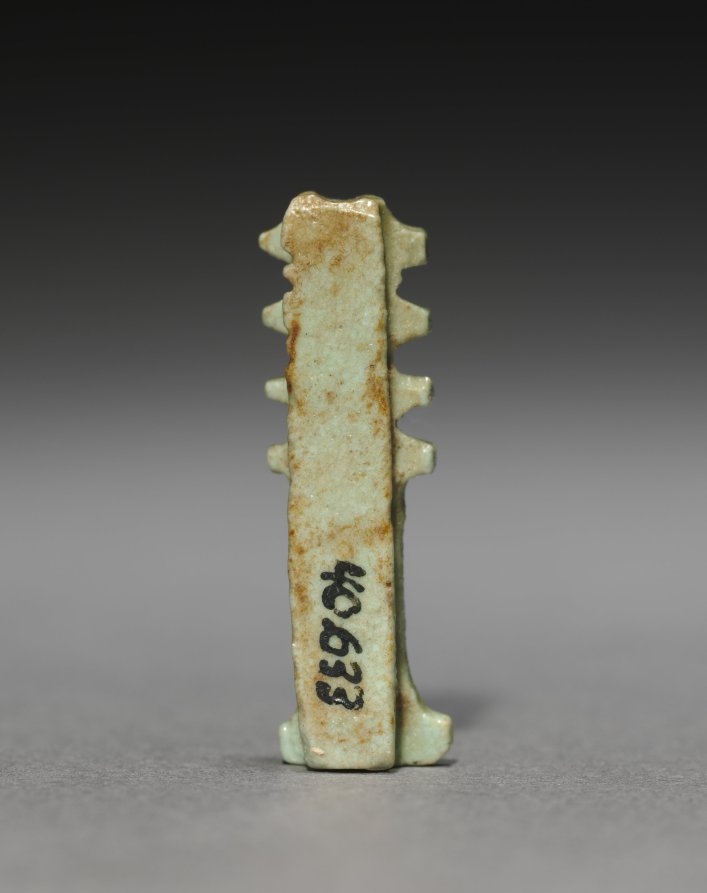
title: Pair of Djed-Pillar Amulets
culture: Egypt, Late period (715–332 BCE), Dynasty 30–Greco-Roman period (332 BCE–395 CE), Ptolemaic dynasty (305–30 BCE)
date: 380–30 BCE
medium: gray-green faience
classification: Amulets